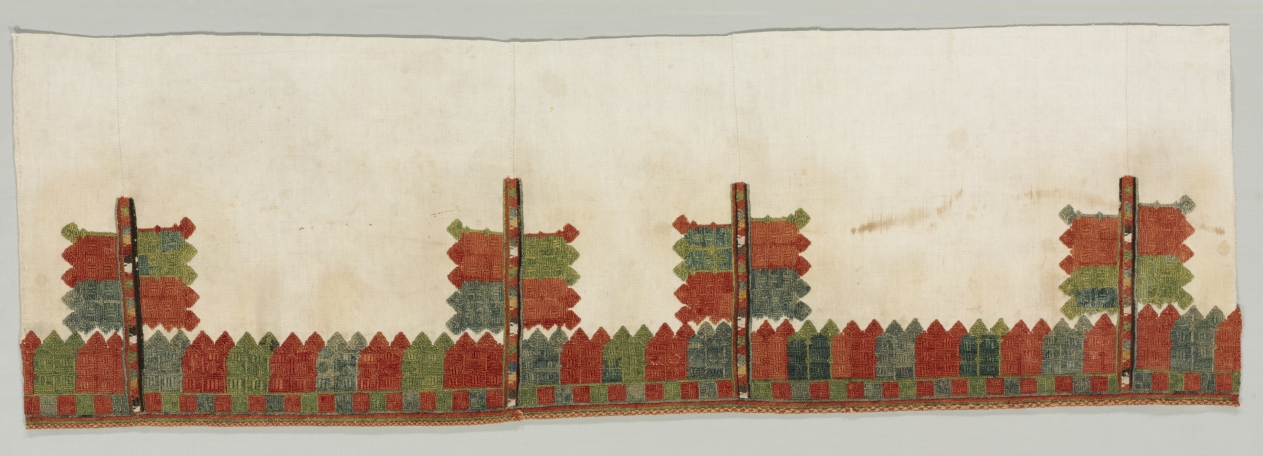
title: Skirt Border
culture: Greece, Dodecanese Islands, 18th century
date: 1700s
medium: embroidery: silk on cotton tabby ground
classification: Embroidery